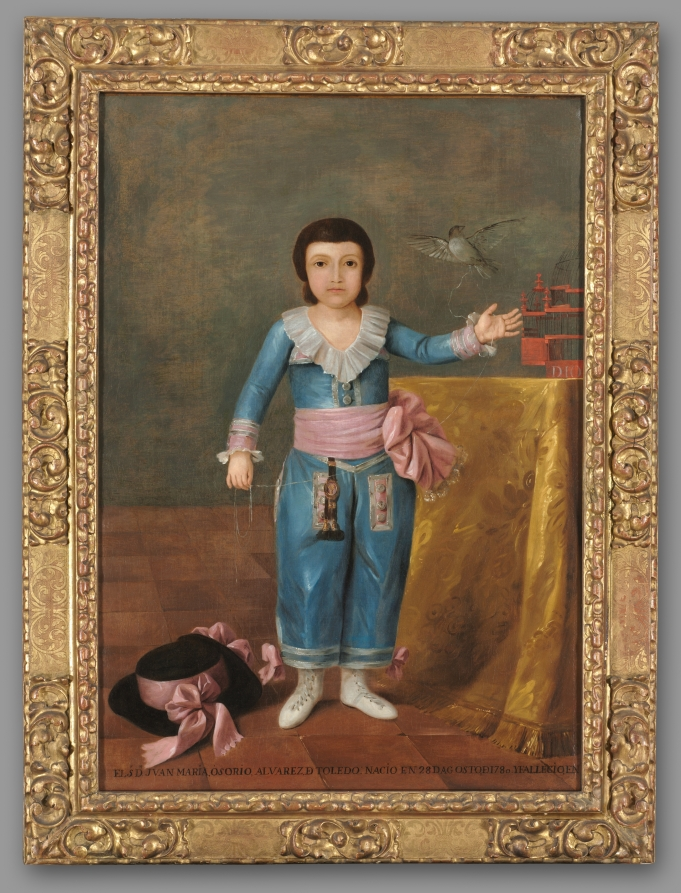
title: Portrait of Juan Maria Osorio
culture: Spain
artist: Agustín Esteve y Marques (Spanish, 1753–c. 1820)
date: c. 1786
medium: oil on canvas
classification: Painting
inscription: Inscribed at bottom: "EL Sr. Dn. JUAN MARIA, OSORIO, ALVAREZ. D TOLEDO; NACIO EN 28 DAGOSTO, D 1780 Y FALLECIO, EN."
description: Esteve y Marques enjoyed a successful early career as a court painter and society portraitist, working as an assistant to the Spanish painter Francisco de Goya before becoming court painter to King Charles IV. The young subject of this portrait is Juan Maria Osorio, one of three sons of Don Vicente Osorio Moscoso Fernandez de Cordoba, the 13th count of Altamira, who also commissioned multiple family portraits from Goya. Esteve and Goya often shared aristocratic patrons, and there are also portraits of the count and his wife attributed to Esteve. The portrait of Juan Maria is somewhat static in execution, the subject lacking vigor and psychological intensity in Esteve's depiction. Yet some of the stiffness of the Cleveland portrait may be due to the fact that this work was probably a posthumous portrait of Juan Maria, who died in 1785 at the age of five.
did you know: The boy holds a string attached to a linnet, a type of finch popular as a pet.